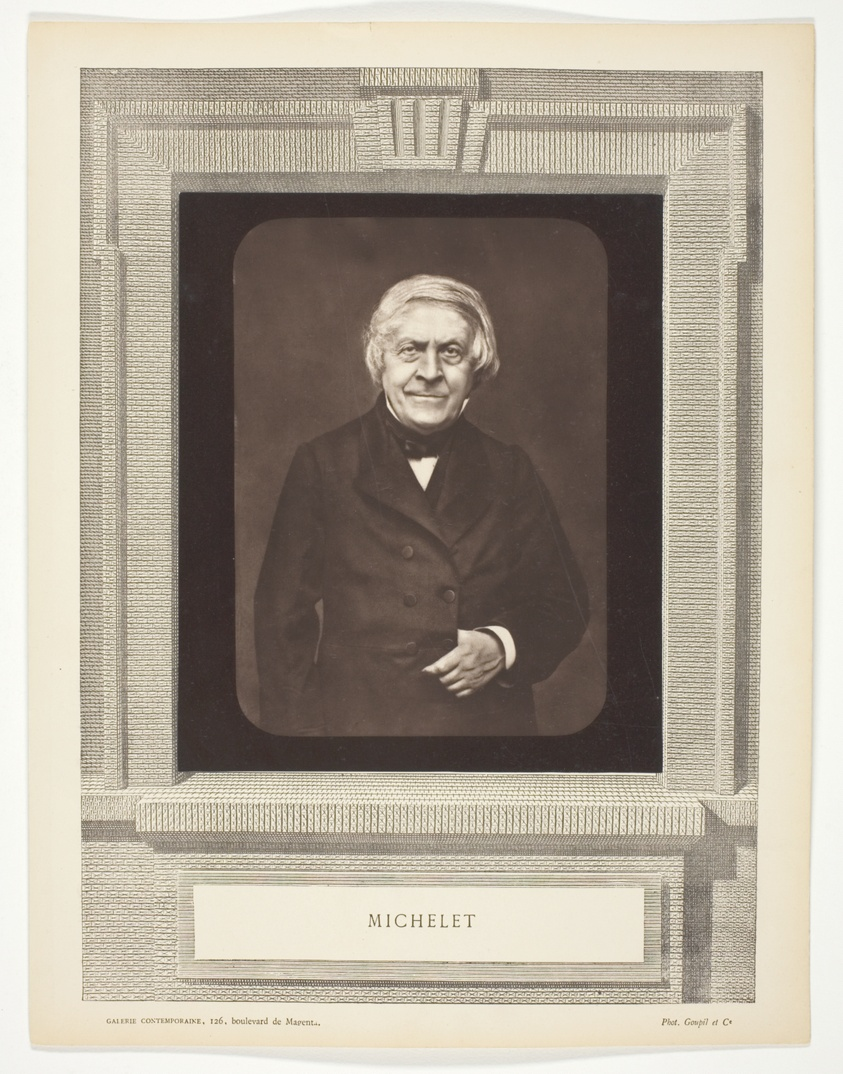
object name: Photograph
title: Michelet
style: 19th century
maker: Goupil et Cie; French, active after 1855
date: c. 1876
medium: Woodburytype, from the periodical “Galerie Contemporaine Littéraire, Artistique” (1876), volume 1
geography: France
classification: woodburytype; photomechanical process; photography; photograph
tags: Collected by Hugh Edwards, Contemporaine Littéraire